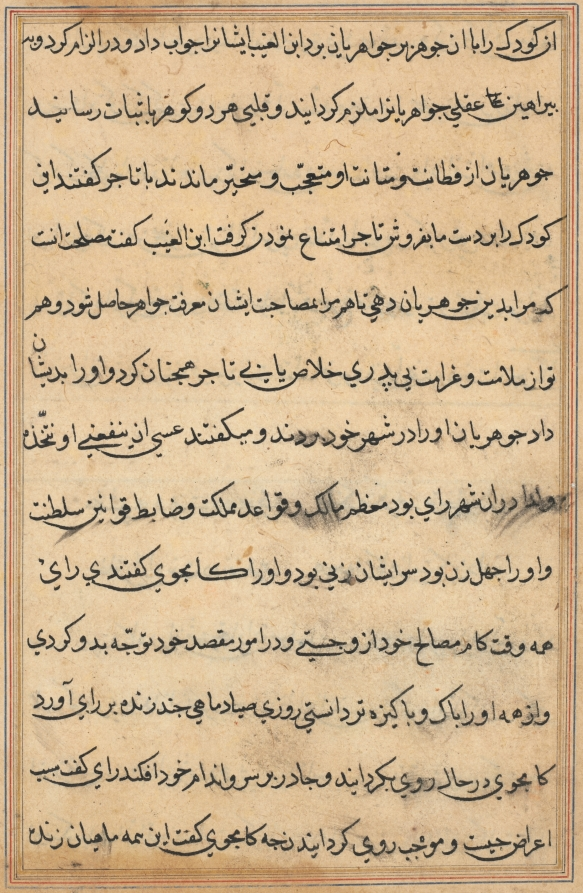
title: Page from Tales of a Parrot (Tuti-nama): text page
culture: Mughal India, court of Akbar (reigned 1556–1605)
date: c. 1560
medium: gum tempera, ink, and gold on paper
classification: Painting